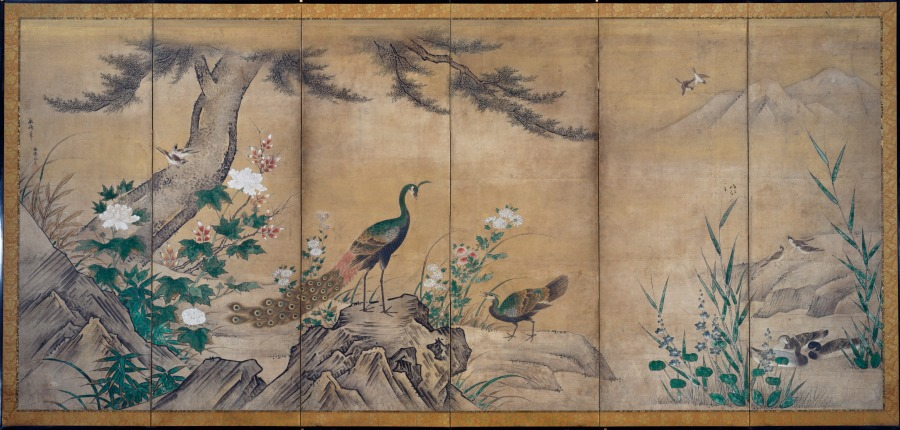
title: Birds and Flowers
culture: Japan, Momoyama period (1573–1615)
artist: attributed to Kano Shōei (Japanese, 1519–1592)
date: late 1500s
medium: One of a pair of six-panel folding screens; ink, color, and gold on paper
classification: Painting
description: The landscape depicted in this pair of screens follows a seasonal progression from right to left, starting with the blossoming plum of early spring and ending with late autumn peonies. A variety of smaller birds are positioned throughout the scene, and a trio of swimming ducks is bracketed by early summer irises and early autumn bellflowers at the center. While some raptors (birds of prey) terrorize a pheasant and an egret (a waterfowl) to the right, a peacock and peahen converse to the left. Hawks are associated with military prowess, while the peafowl suggest cultural prestige.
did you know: Military class patrons frequently requested scenes depicting predation, such as hunting scenes that were inserted as additional subject matter in otherwise tranquil vistas celebrating flora and fauna.